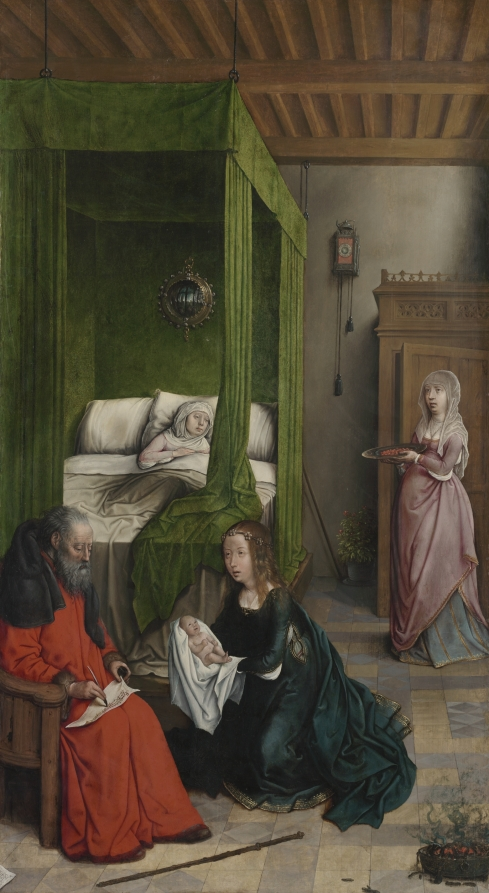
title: The Birth and Naming of John the Baptist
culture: Flanders, early 16th Century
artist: Juan de Flandes (Netherlandish, c. 1460–1519)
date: 1496–99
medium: oil on wood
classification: Painting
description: Typical of Flemish art of the period, this scene suggests a comfortable home of the late 1400s in the Netherlands to frame the story of a biblical birth. Elizabeth, mother of Saint John the Baptist, rests after her labor, while her cousin, the Virgin Mary, presents the newborn to his father, Zacharias. Having lost his ability to speak when he doubted an angel’s prophecy of the child’s birth, Zacharias writes down his son’s name. At this moment, his speech is restored. This painting was once part of an altarpiece commissioned by Queen Isabella I of Castile, known as the Catholic (1451–1504), for a monastery near Burgos.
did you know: Flemish artists are famed for their attention to minute detail. Here the artist paints a domestic setting from his own time period, complete with details like a brazier for heating in the lower right corner and concave mirror above the bed.